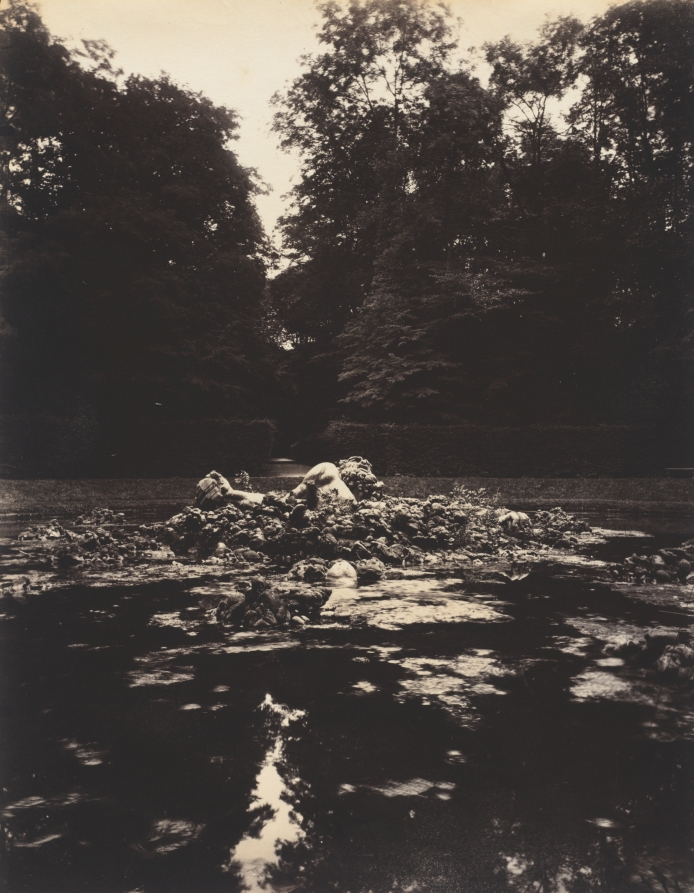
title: Versailles, Fountain of Enceladus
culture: France, 20th century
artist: Eugène Atget (French, 1857–1927)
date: 1922–1923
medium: albumen print, gold toned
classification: Photograph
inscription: Written in pencil on verso: "VERSAILLES BASSIN DE/L'ENCELADUS 1166"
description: Taken in his later campaign of photographing at Versailles during the 1920s, Atget magically--through his ingenuous composition and use of light and shade--captured the pathos and expressive vigor of Gaspard Marsy’s 1675-77 sculpture from a sketch provided by the painter Charles Le Brun. This baroque, gilded metalwork depicts Enceladus, the mightiest of the giants in Roman mythology. Jupiter cast down and crushed the giant under a mound of rock after he dared to attack Mount Olympus to dethrone the gods. Enceladus, vanquished by his temerity and pride, clings to the stones with all the strength of his half-buried body.